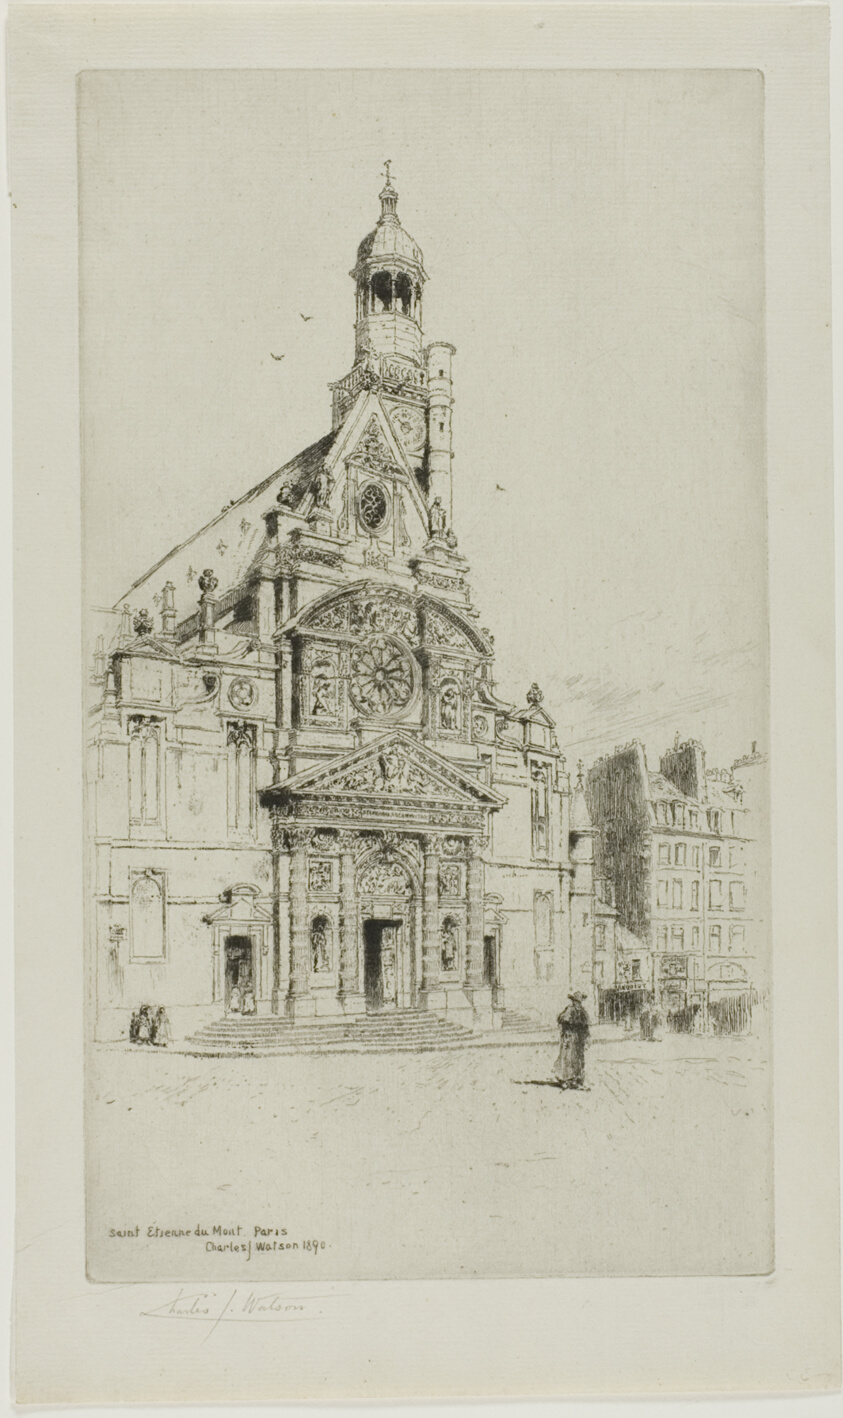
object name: Print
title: St. Etienne du Mont, Paris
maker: Charles John Watson (English, 1846-1927)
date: 1890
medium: Etching in black on cream laid paper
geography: England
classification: etching; print; prints and drawing